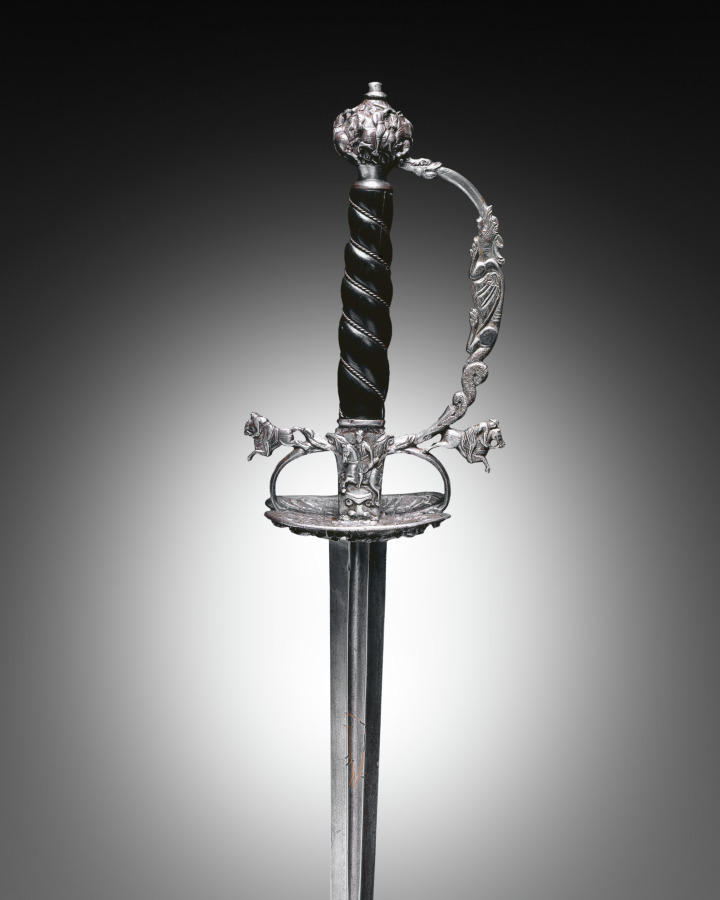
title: Small Sword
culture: Germany, Passau (?), 17th century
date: 1640–60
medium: steel, wood, steel wire, copper, chiseled shell guard; blade: blued, gilded, pierced and engraved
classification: Arms and Armor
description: During the 1700s, the small-sword emerged as a light, quick weapon. Like the rapier it was carried by unarmored civilians, the noblemen of the upper classes. Over time this delicate sword became more an accessory of male attire than a weapon essential to life and death. The sword hilt, which shows even when the blade is sheathed, became the ground for elaborate decoration. These small-swords thus represent the final stage in the evolution of the sword, from the edged weapons of antiquity to the elegantly refined blades of the 1700s and 1800s.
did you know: This small sword has a veritable panoply of animal imagery. Men ride horses across the crossguard, the horizontal element closest to the blade, and around the pommel, the globular tip of the handle. Mythical animals feature prominently on the guard, the semi-circular piece that covered the knuckles.